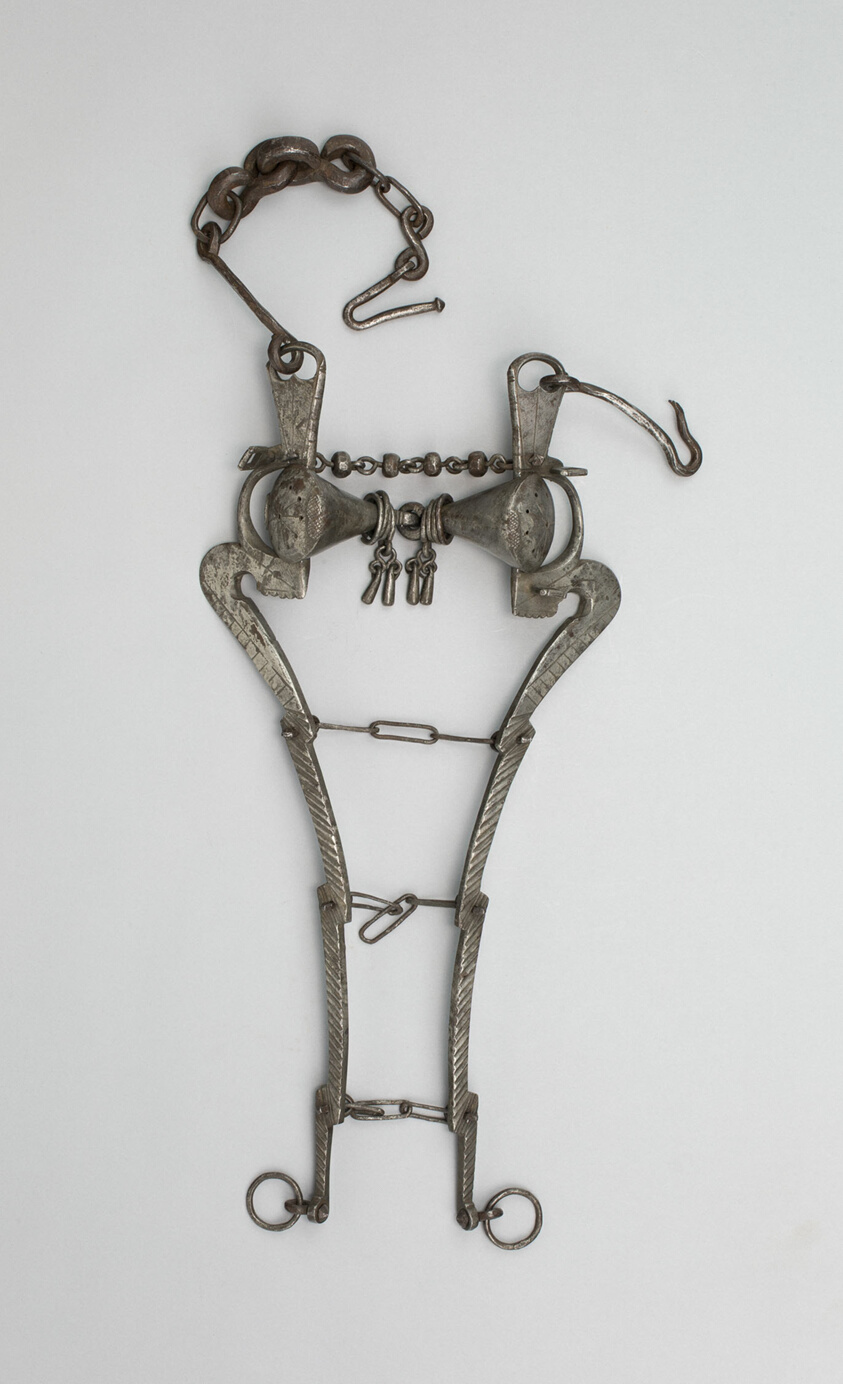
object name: Armor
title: Curb Bit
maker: German (?)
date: early 16th century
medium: Iron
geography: Germany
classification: horse equipment; armor; arms and armor